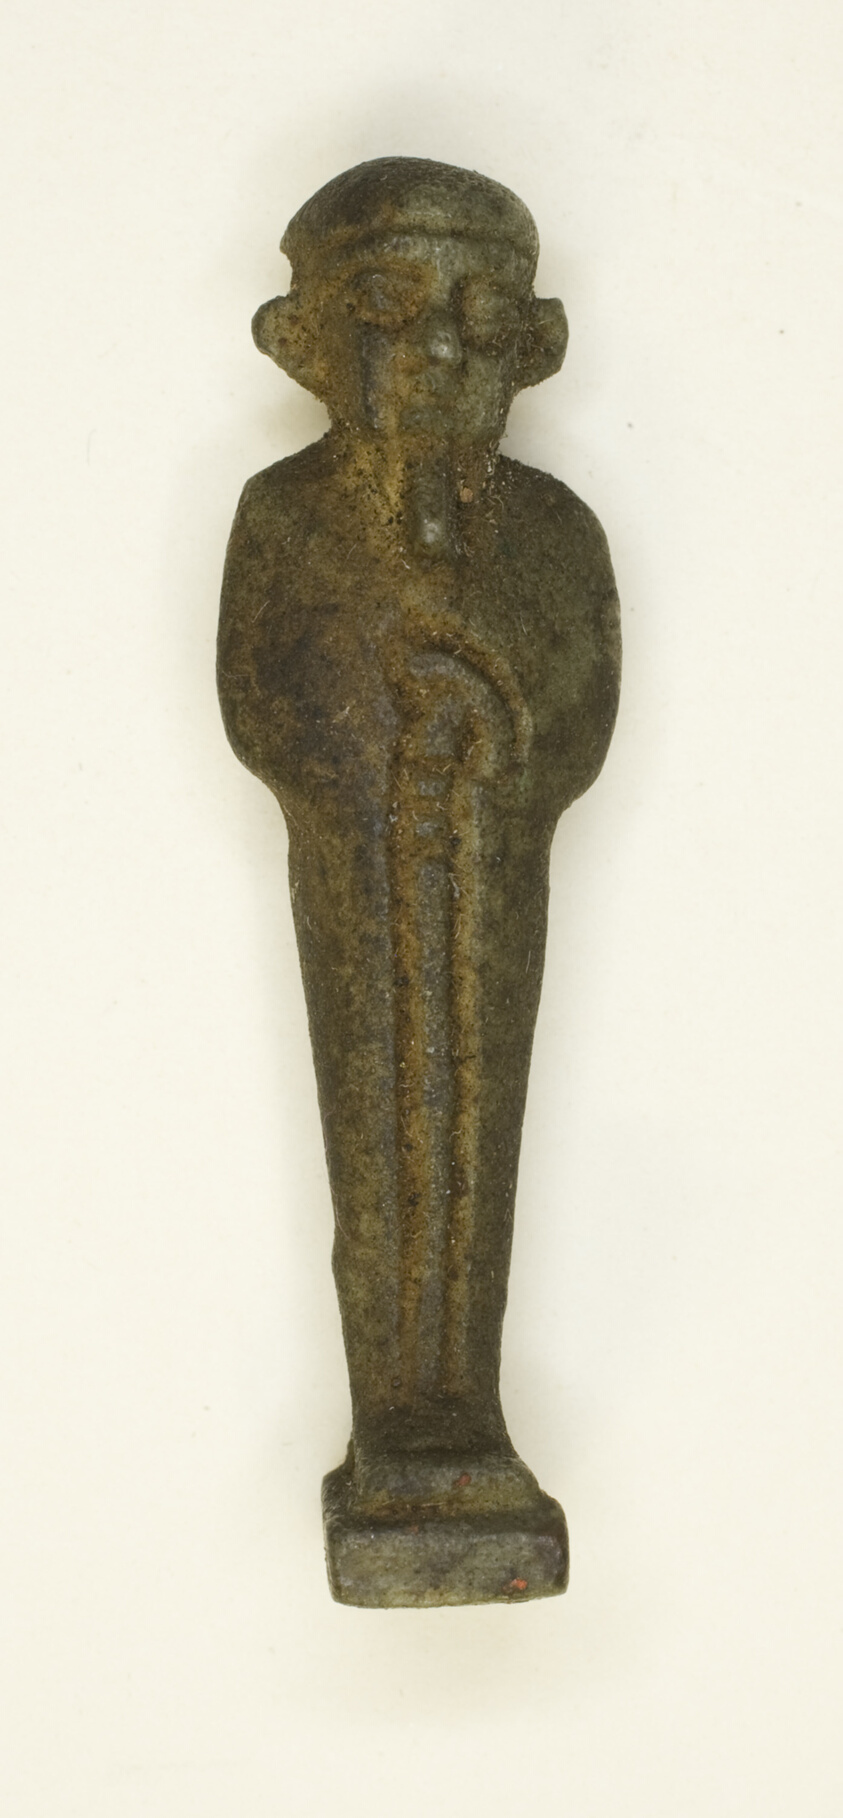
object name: Costume and Accessories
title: Amulet of the God Ptah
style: egyptian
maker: Egyptian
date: Late Period, Dynasty 26–31 (664–332 BCE)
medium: Faience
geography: Egypt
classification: amulet; jewelry; ceramics; ancient art; costume; faïence (composite material)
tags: gods (deities)